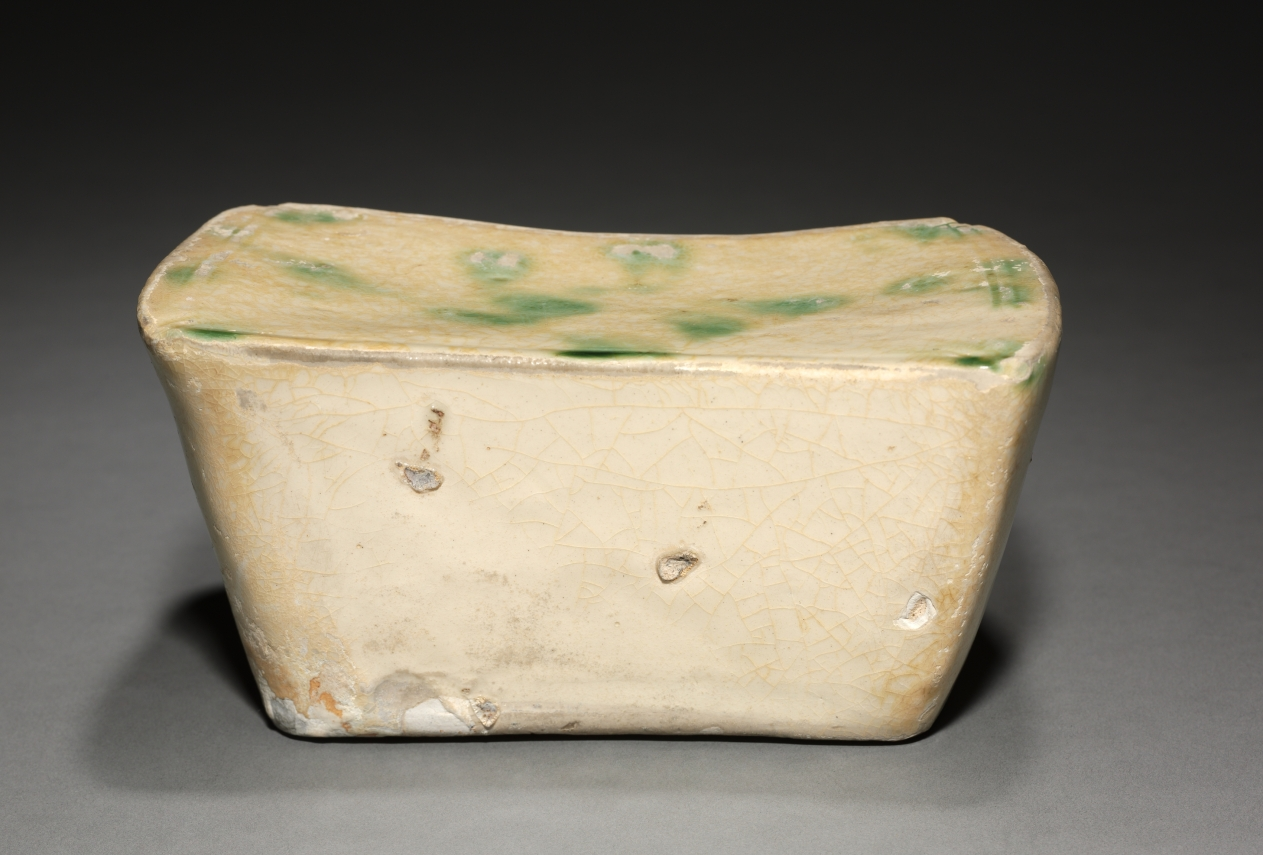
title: Pillow: Wazhaping ware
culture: China, Hunan province, Changsha, Five dynasties (907-960)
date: 906–960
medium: glazed stoneware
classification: Ceramic